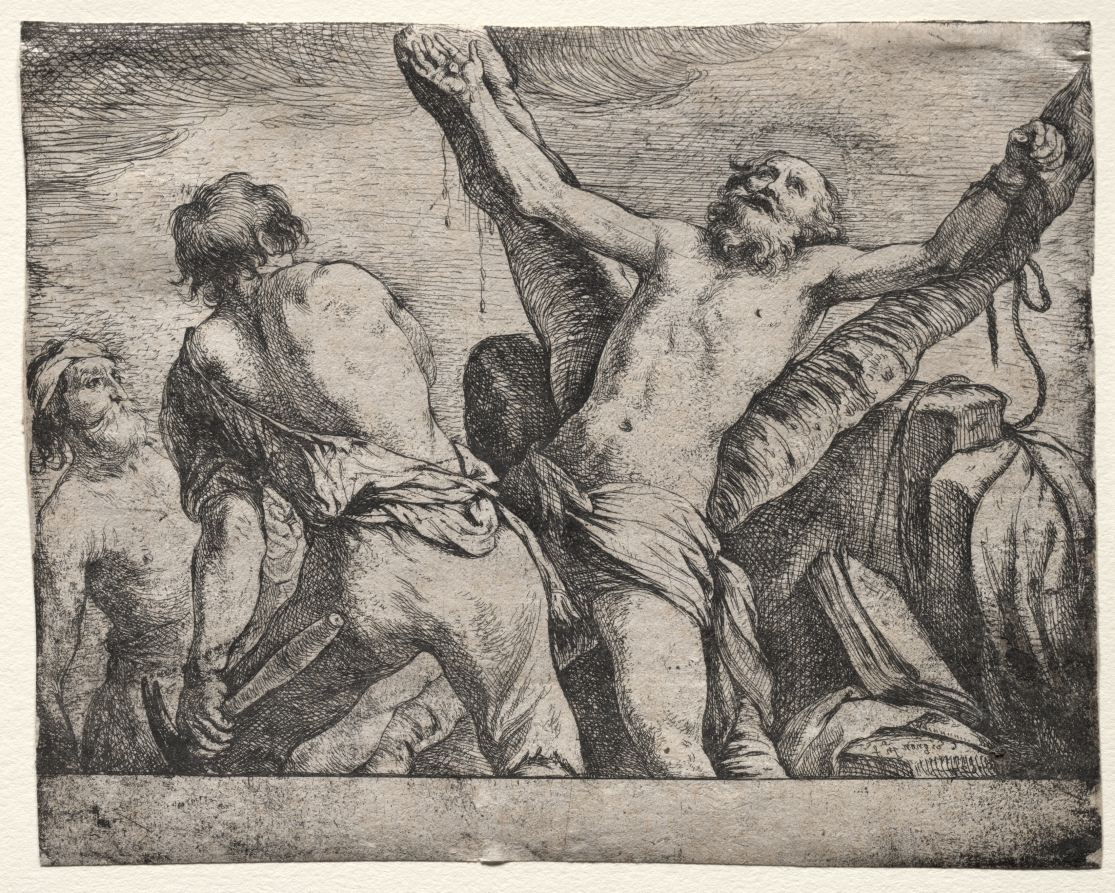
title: The Martyrdom of St. Andrew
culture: France, 17th century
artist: Claude Vignon (French, 1593–1670)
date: c. 1623–30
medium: etching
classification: Print